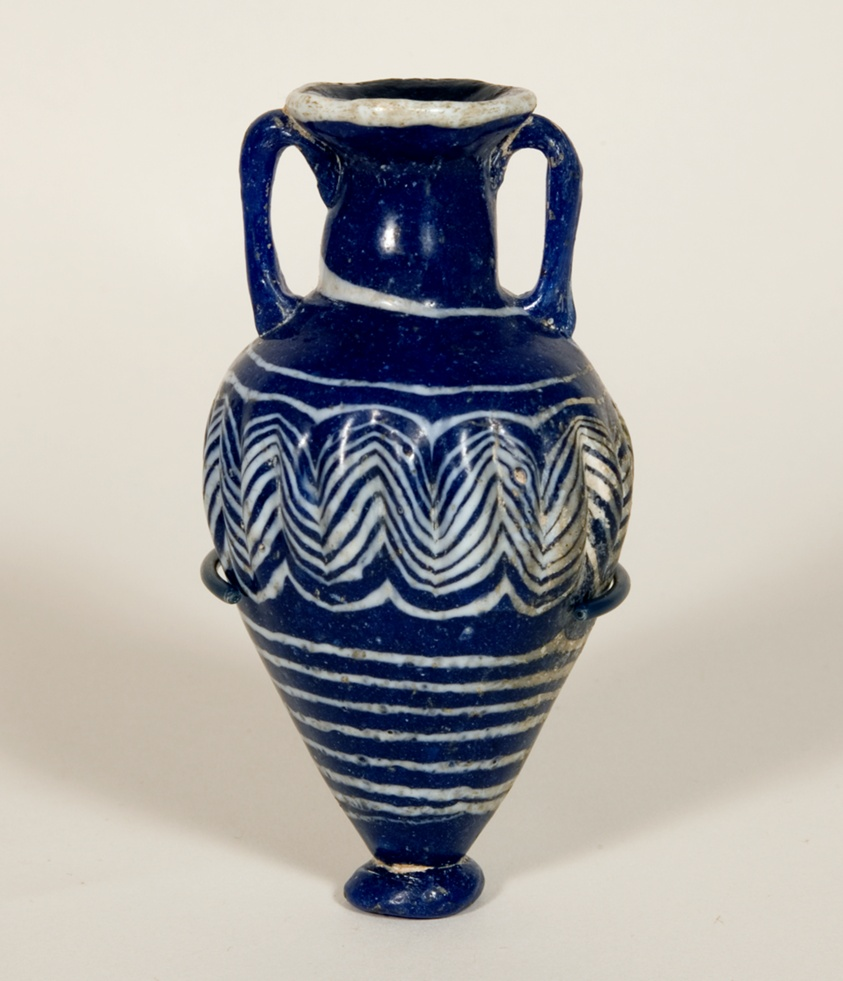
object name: Vessel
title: Amphoriskos (Container for Oil)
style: ancient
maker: Eastern Mediterranean, possibly Rhodes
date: 5th-early 4th century BCE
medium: Glass, core-formed technique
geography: Ródhos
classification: container; amphoriskos; glass; vessel; ancient art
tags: vessels